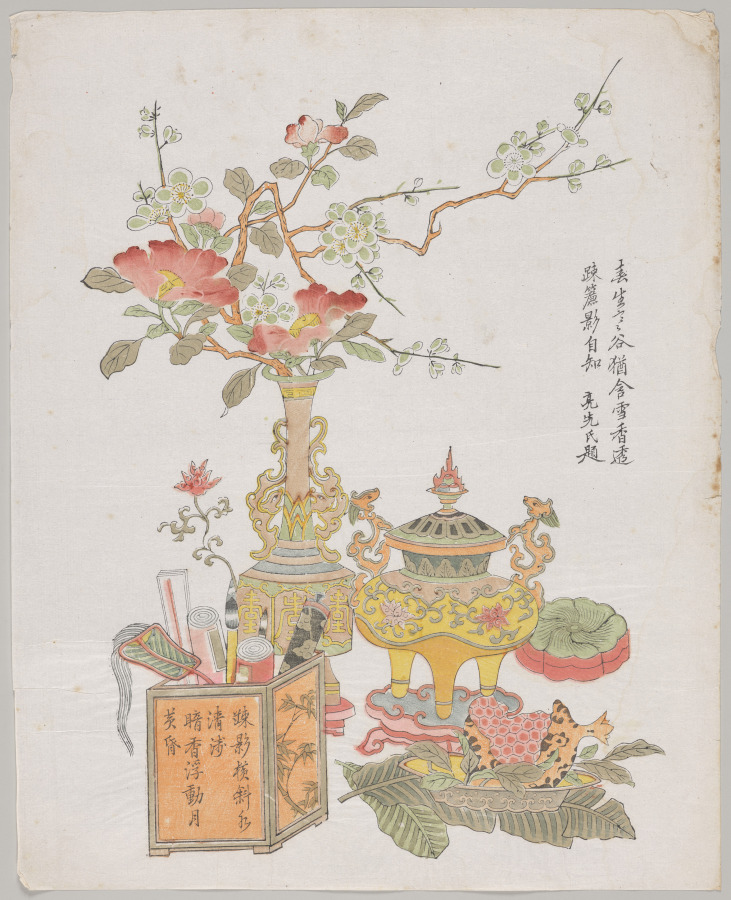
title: Plum and Camellia in a Bronze Vase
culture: China, Suzhou, Qing dynasty (1644–1911)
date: 1700–1750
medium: Polychrome woodblock print; ink and color on paper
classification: Print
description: In the 1600s, printing flourished in such Jiangnan cities as Nanjing, Suzhou, Hangzhou, and Huizhou, evolving from privately enjoyed illustrated books printed in color to more commercialized single-sheet color prints that were hung on walls and became part of the rich urban visual culture.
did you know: Woodblock printing in color reached a height in China in the 1600s to 1700s. The prints were executed by means of sets of separate blocks, each carved to print a different color.